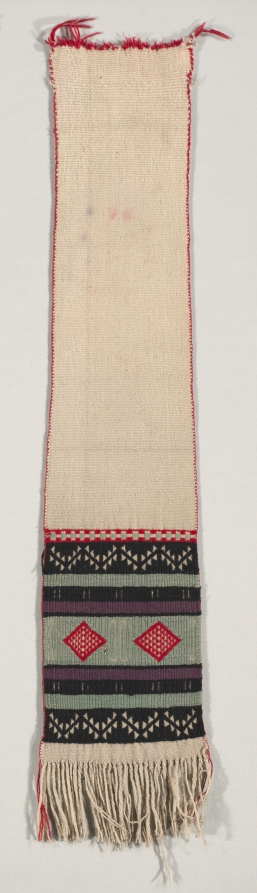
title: "Hopi Brocade" Style Dance Sash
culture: America, Native North American, Southwest, Pueblo (Hopi), Post-Contact, Transitional Period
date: c. 1880–1900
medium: plain weave with supplementary weft wrap; wool (homespun and Germantown)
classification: Textile